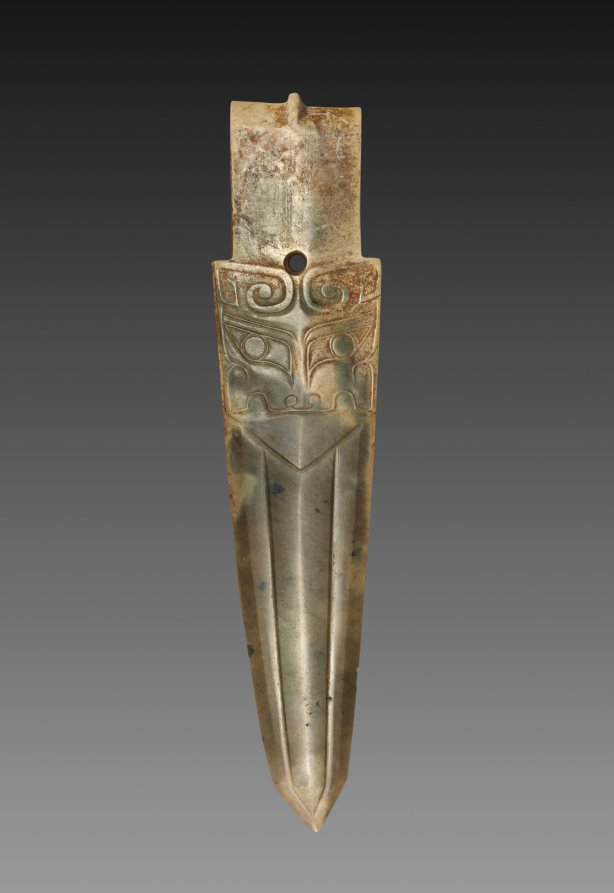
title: Ceremonial Dagger-Axe with Animal Masks (Ge)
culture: China, Shang dynasty (c. 1600–c. 1046 BCE)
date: c. 1600–1050 BCE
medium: jade (nephrite)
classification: Jade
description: Jade is an extremely hard material. In ancient China, it was carved or ground with fine abrasives, such as quartz sand, affixed to cutting or drilling tools. The form of this jade (ge, ceremonial dagger axe), was likely derived from similarly shaped bronze weapons. The pointed and slightly curved blade was symmetrically carved. It seems to emerge from the mouth of the taotie, the animal mask. The taotie’s curved horns were carved in relief bands; its eyes, snout, and upper jaw are delineated in threadlike relief. Similar taotie designs are also seen on bronze vessels of the same period. The hole in the tang indicates where the blade was originally attached to a wooden shaft.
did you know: Traces of vermilion or cinnabar remain on the taotie mask design.